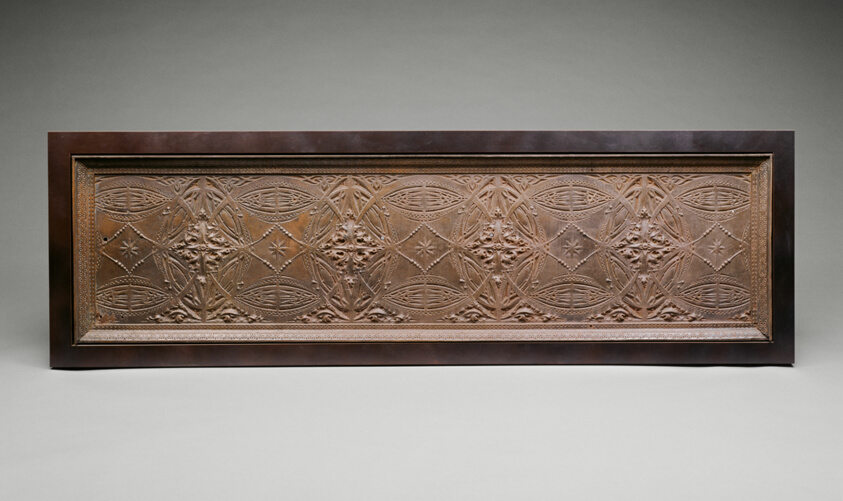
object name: Architectural fragment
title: Elevator Frieze Panel from the Chicago Stock Exchange Building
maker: Adler and Sullivan (American, 1883–1896); Louis H. Sullivan (American, 1856–1924); Dankmar Adler (American, born Germany, 1844–1900)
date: 1893-94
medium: Copper-plated cast iron in metal frame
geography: Chicago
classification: architectural fragment; architecture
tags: Chicago